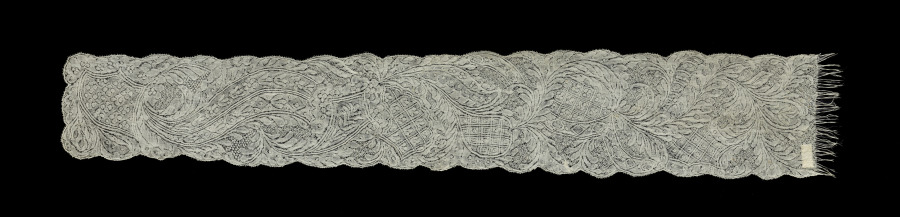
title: Lace Lappet (one of a pair)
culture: Belgium, Binche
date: 1700s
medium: Linen: bobbin lace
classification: Lace